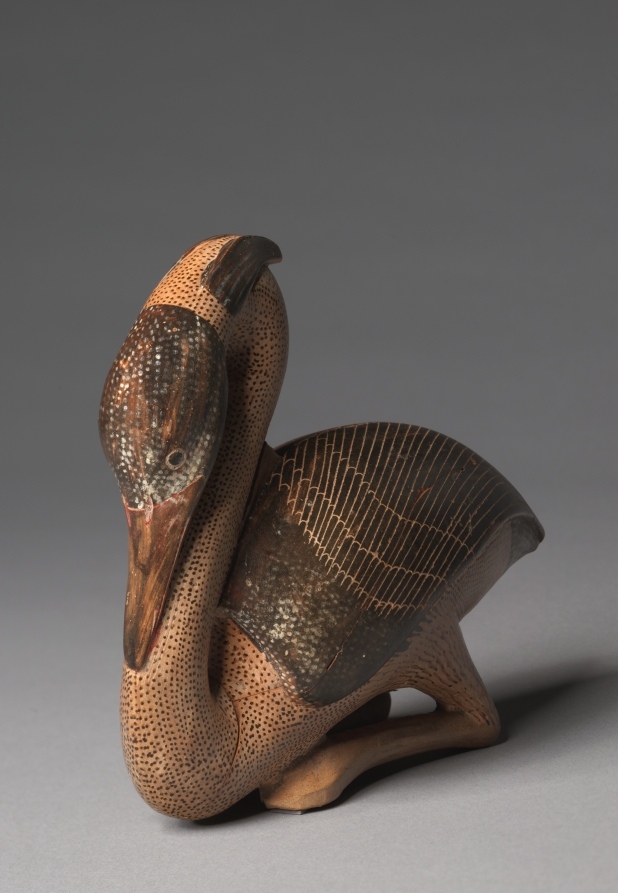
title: Heron-Shaped Figure Vase (Oil Vessel)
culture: East Greek, probably Milesian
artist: assigned to Robertson's Group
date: c. 580 BCE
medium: ceramic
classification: Ceramic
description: In the 6th century BC, a particular type of vessel for scented oil was produced in Corinth, Rhodes, and along the western coast of Asia Minor. Primarily animal forms, they are made of unglazed fired clay with painted decoration. This example in the form of a heron was crafted by a Milesian potter. The bird rests with its delicately curving and counter-curving neck nearly touching the ground; the feathers are defined by incision and painted black slip.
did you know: An aryballos is a vessel that contained scented oils, this one in the shape of a heron.